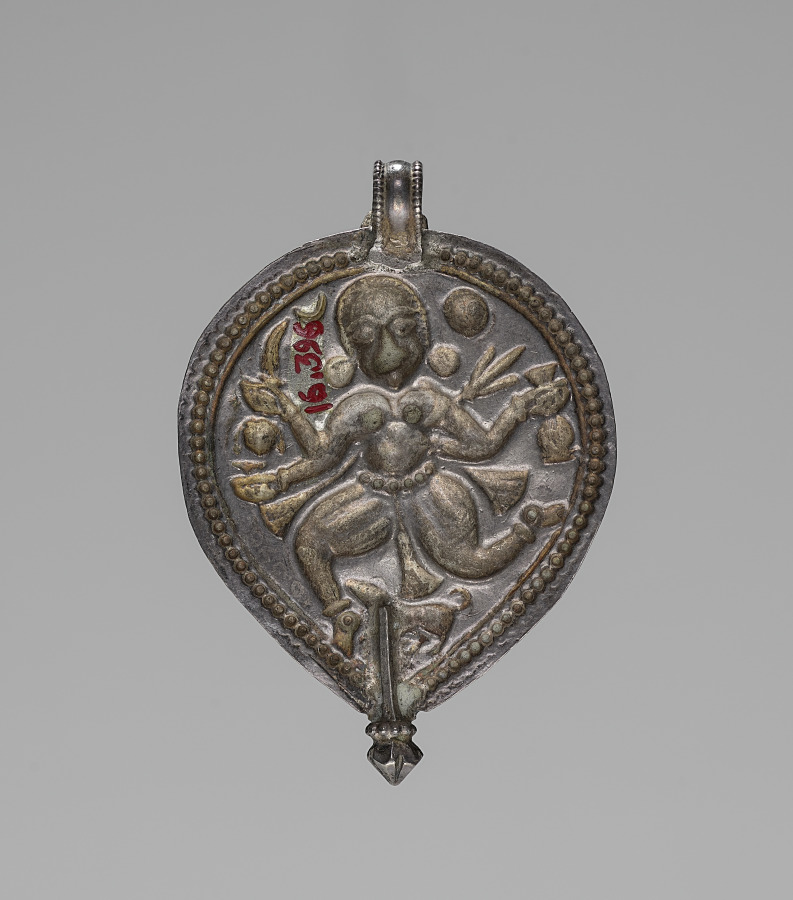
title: Amulet in the Shape of a Pipal Leaf (Ficus religiosa) with Four-armed Dancing Shiva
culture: India, Ajmere, Bombay Presidency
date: 1800s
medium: silver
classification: Jewelry